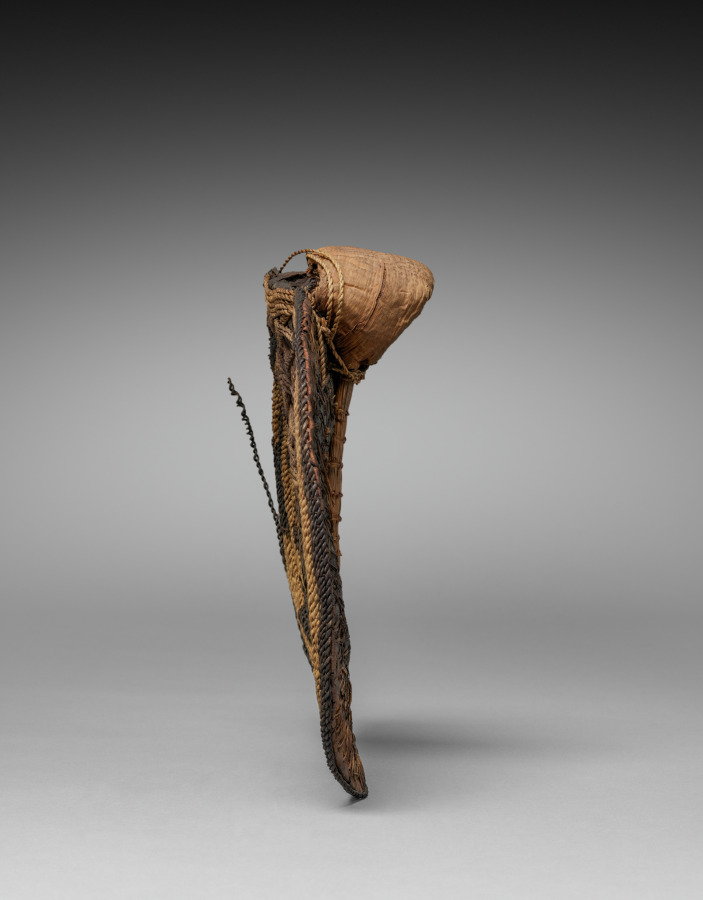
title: Back Skirt / Sitting Pad (negbe)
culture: Africa, Central Africa, Democratic Republic of the Congo, Mangbetu-style maker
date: before 1929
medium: Plant fibers and dye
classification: Garment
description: Egbe (singular: negbe) were fashionable and practical garments aristocratic Mangbetu women made for special occasions. Worn over a skirt, it tied onto a girdle along with a frontal “apron.” The curved interior piece rested on the lower back. Thickly woven, flexible natural fibers bent with the body, cushioning the wearer’s behind when sitting. When the woman was standing, the decorated flat portion faced outward, showing off bold geometric motifs. Egbe were among items sold to foreigners at the Mangbetu king’s encouragement as the Mangbetu actively constructed their self-image for outsiders during the 1920s and 1930s.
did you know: A contemporary fashion in 1929, when it was purchased or collected, this negbe is now a historical document of past styles.